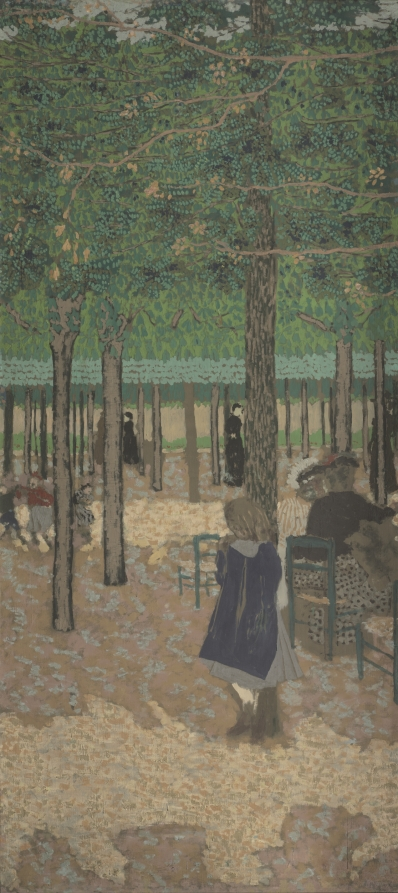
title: Under the Trees (from "The Public Gardens")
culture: France, 19th century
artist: Édouard Vuillard (French, 1868–1940)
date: 1894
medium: distemper on fabric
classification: Painting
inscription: Signed lower right: E. Vuillard 94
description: This painting is from a nine-panel decorative series showing children playing in two of Paris’s most spacious parks: the Tuileries Gardens and the Bois de Boulogne. It depicts a game of hide-and-seek in which a girl conceals herself behind a tree. The stillness of the women resting on green chairs at the right is countered by children running at the left. Rather than a realistic rendering of the subject, Édouard Vuillard arranged the composition in bands of colorful, decorative patterns so that the painting seems like a tapestry.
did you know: Vuillard's social circle included actors and directors. He often contributed to their theatrical pursuits by designing costumes, programs, and set pieces. In this panel from a nine-part series, a patterned landscape recalls scenery for the stage.